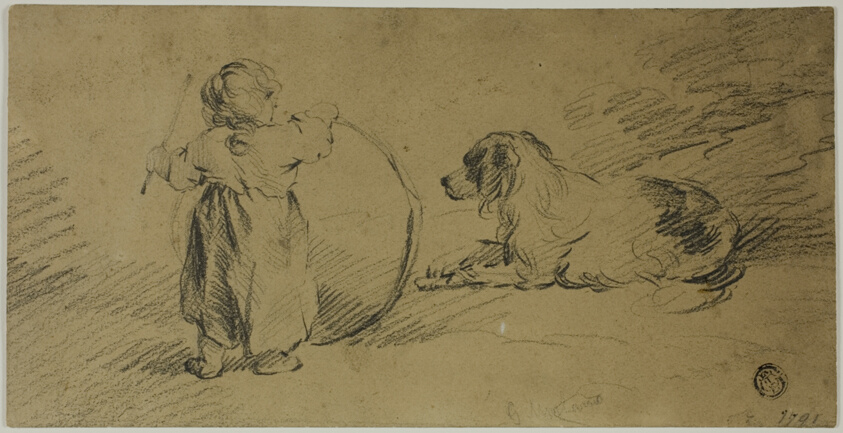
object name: Drawing and Watercolor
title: Child Playing with Ball and Dog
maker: George Morland (English, 1763-1804)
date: 1791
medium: Black crayon on brown wove paper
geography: England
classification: crayon; drawings (visual works); prints and drawing